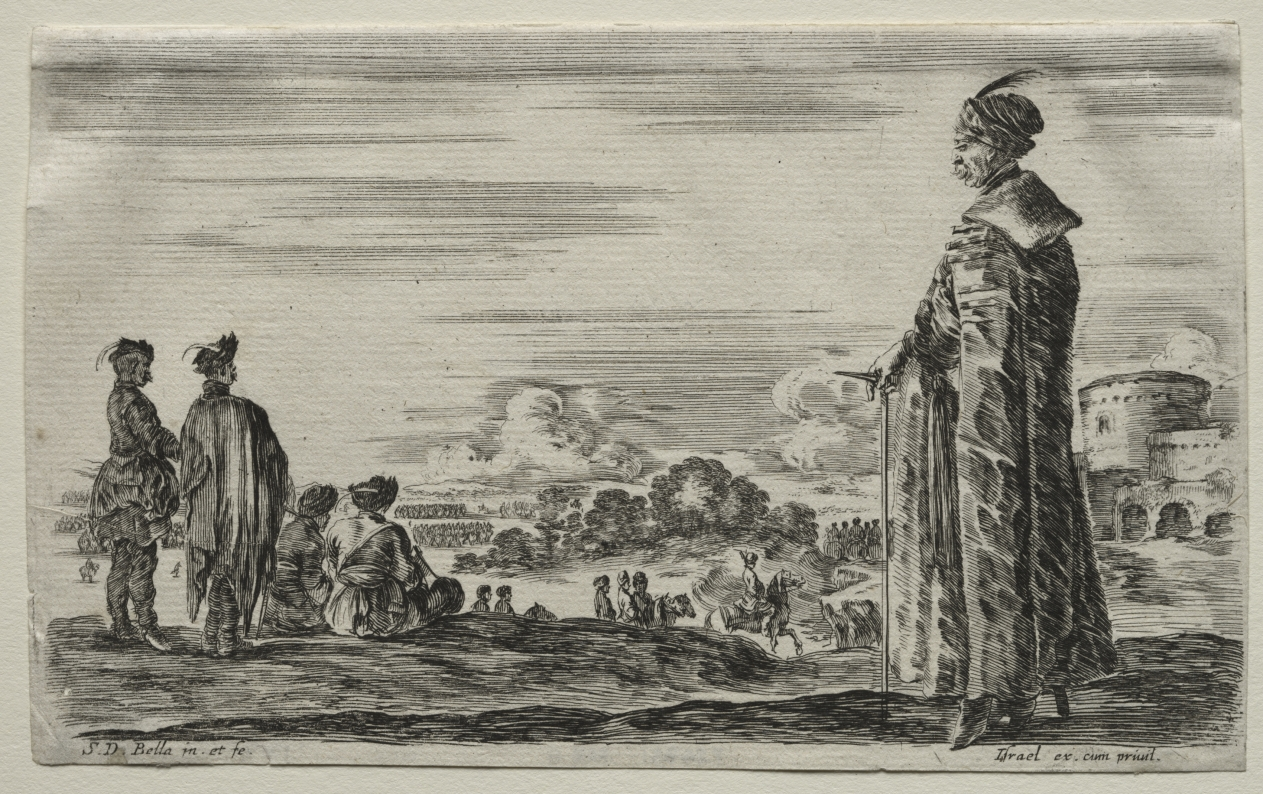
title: Various Figures and Landscapes: A Group of Polish Gentlemen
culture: Italy, 17th century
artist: Stefano Della Bella (Italian, 1610–1664)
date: 1649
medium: etching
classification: Print